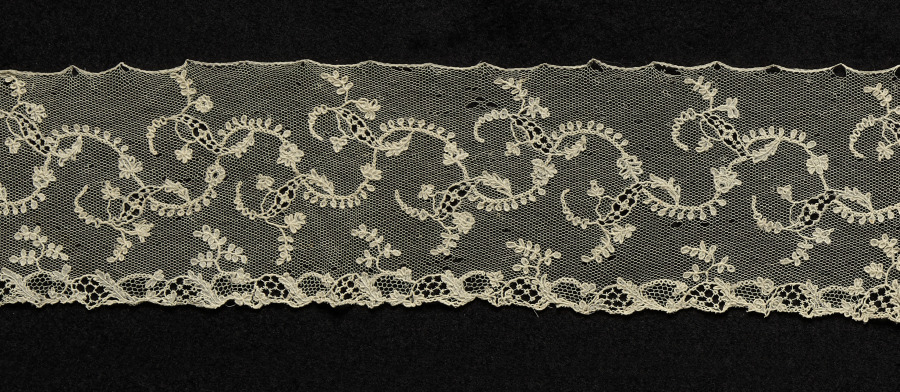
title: Lace Edging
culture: Belgium, Brussels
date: 1780s–90s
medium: Linen: bobbin lace (appliqué)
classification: Lace